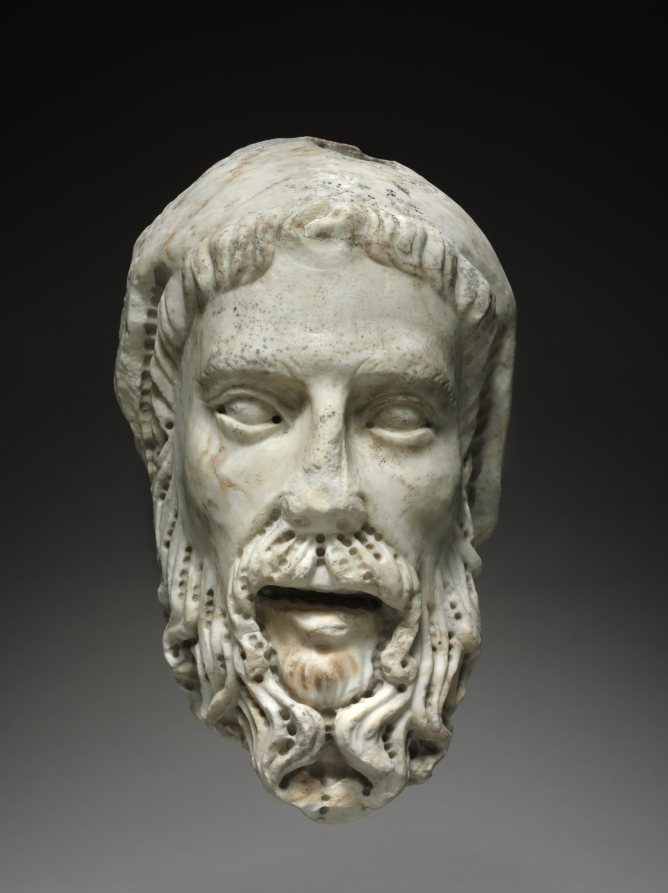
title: Head of a Prophet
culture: Italy, Siena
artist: workshop of Giovanni Pisano (Italian, c. 1240-c. 1320)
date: c. 1300–1325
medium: marble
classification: Sculpture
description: This head exhibits many of the characteristics of the style associated with the workshop of Giovanni Pisano. These are particularly noteworthy in the sensitive carving of the haunting face and its strikingly drilled beard. The head compares favorably to the sculpture made while Giovanni was master of works at Siena Cathedral (1285-97). Recent research suggests that it may once have belonged to a full-length Old Testament prophet looming on the exterior of Siena Cathedral.